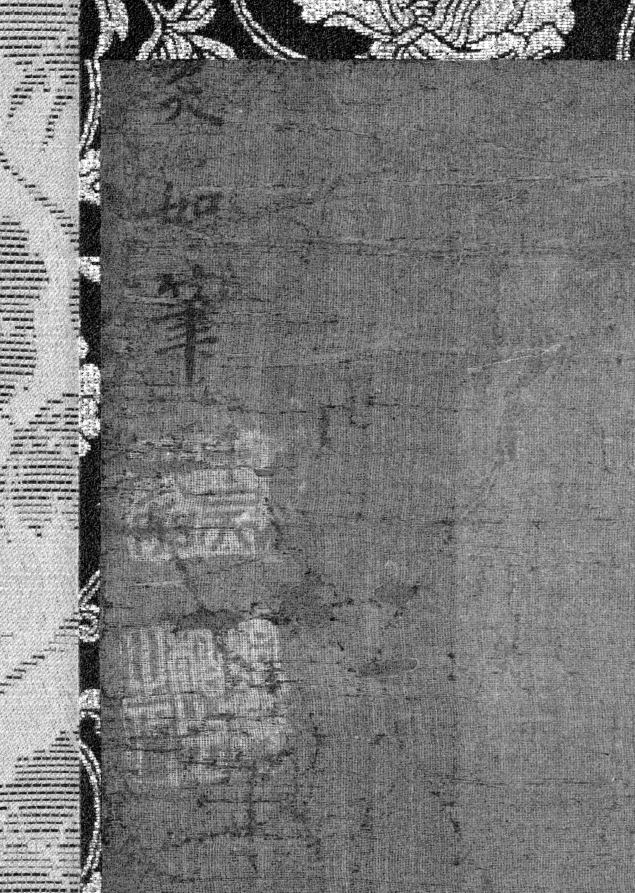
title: Narcissus and Rocks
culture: China, Ming dynasty (1368–1644)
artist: Lu Tianru (Chinese, first half of 1400s)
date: 1368–1644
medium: hanging scroll, ink on silk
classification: Painting